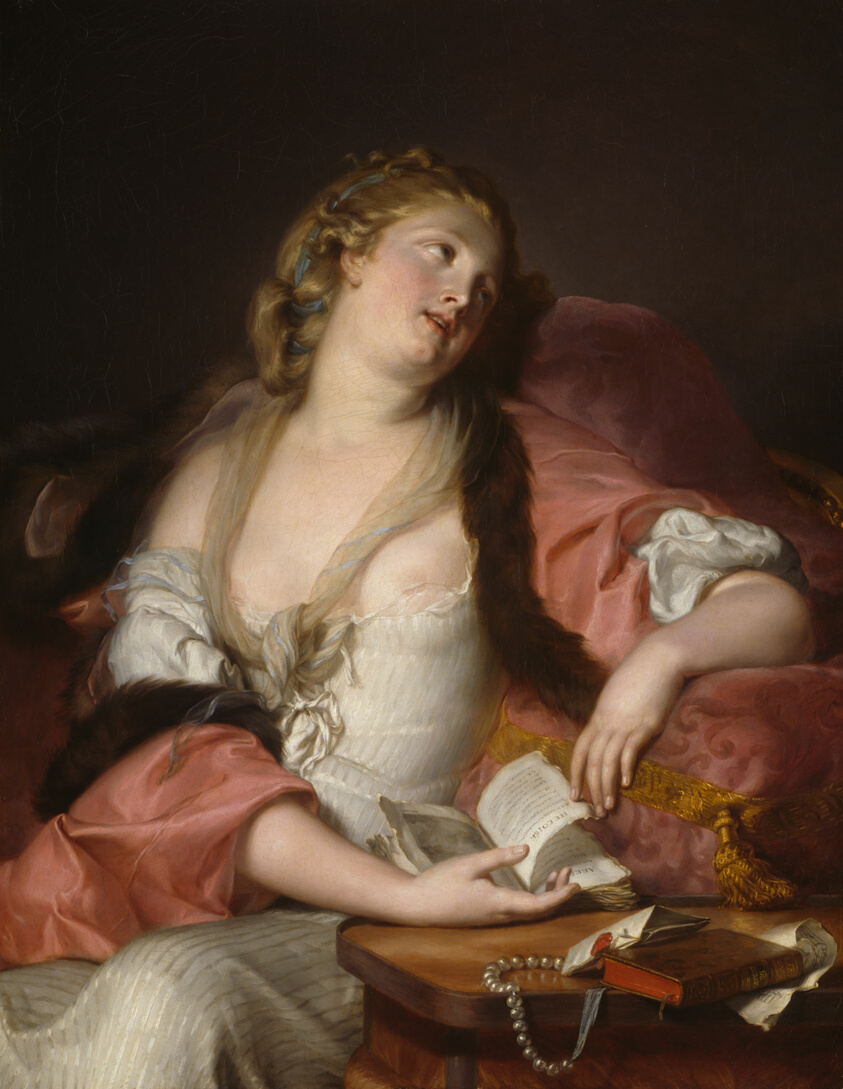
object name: Painting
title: Lady Reading the Letters of Heloise and Abelard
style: 18th Century, genre painting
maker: Bernard d'Agesci (French, 1756–1829)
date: c. 1780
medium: Oil on canvas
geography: France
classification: oil on canvas; french; paint; painting; european painting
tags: woman, book, dresses, French, interior, leisure, letters (correspondence), love, music, pearls, poetry